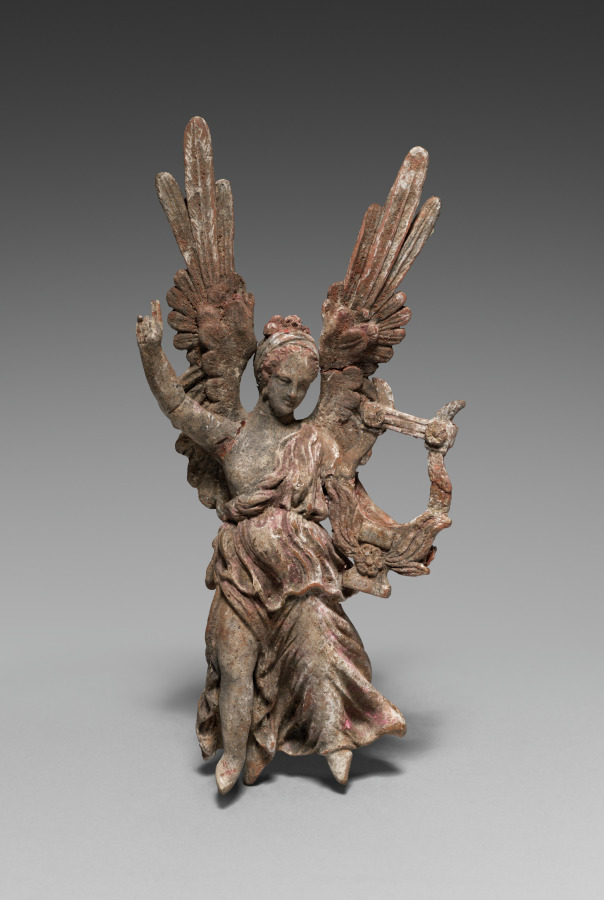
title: Figurine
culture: Greece, Myrina, Hellenistic period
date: 300–100 BCE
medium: terracotta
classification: Sculpture